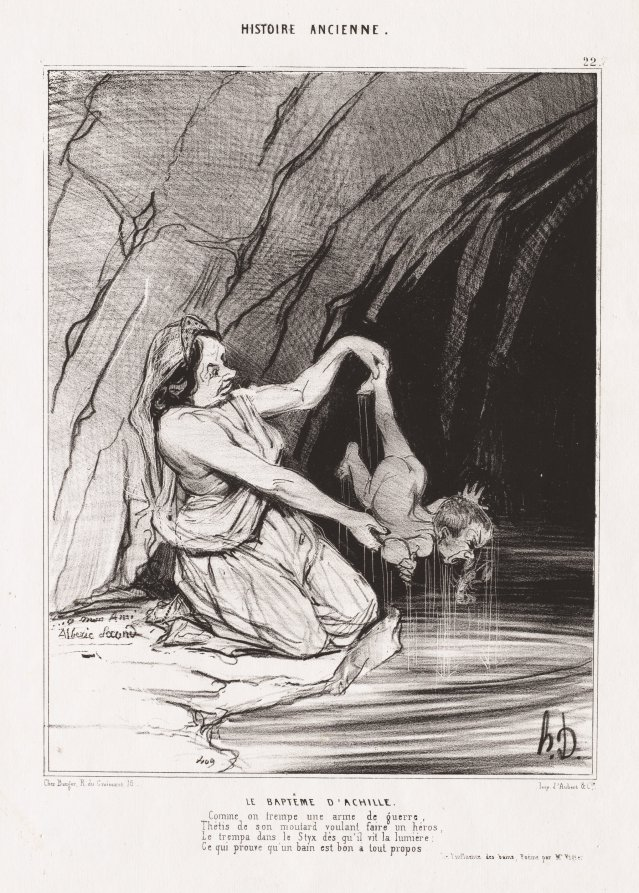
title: The Baptism of Achilles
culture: France, 19th century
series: Ancient History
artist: Honoré Daumier (French, 1808–1879)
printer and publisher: Aubert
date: 1842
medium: lithograph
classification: Print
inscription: Above image, printed: HISTORIE ANCIENNE. / 22 ; Below image, printed: LE BAPTÊME D'ACHILLE. / Comme on trempe une arme de guerre, / Thétis de son moutard voulant faire un héros, / Le trempa dans le Styx dès qu'il vit la lumière; / Ce qui prouve qu'un bain est bon à tout propos. / (De l'influence des bains, Pöeme par Mr. Vigier).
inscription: Lower margin, printed: Chez Bauger, R. du Croissant 16. / Imp. d'Aubert & Cie.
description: This print was published in Le Charivari (August 28, 1842) as plate 22 from the series Ancient History.